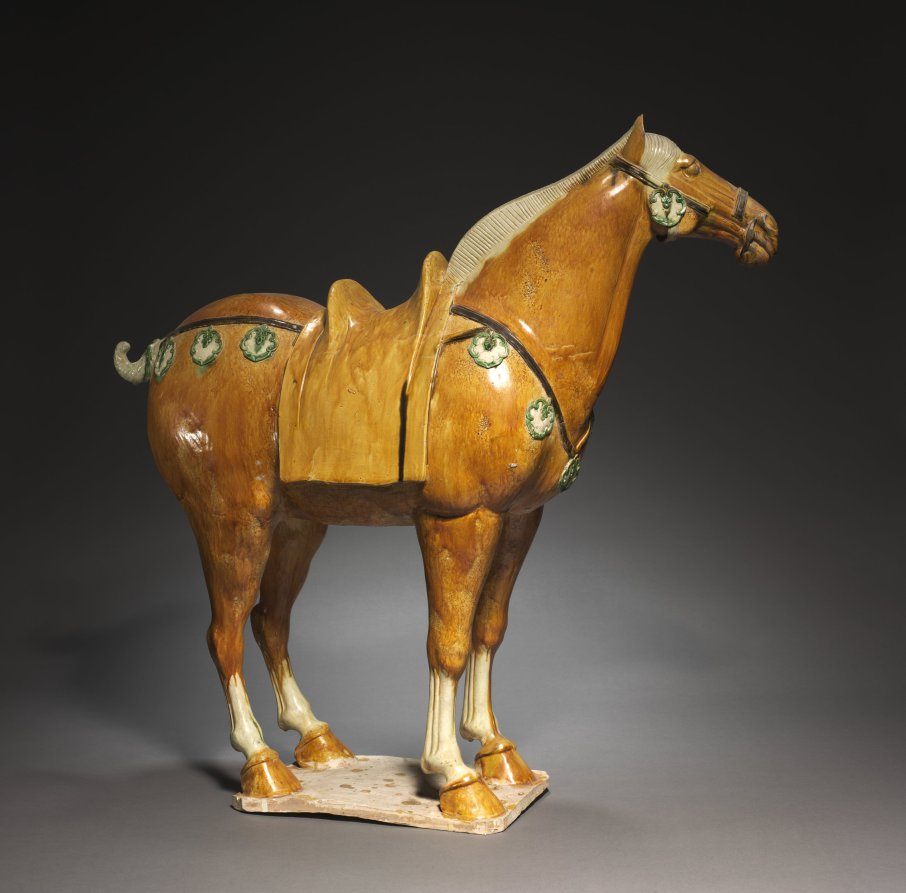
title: Horse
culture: China, probably Henan province, Tang dynasty (618–907)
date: late 600s–800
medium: glazed earthenware, sancai (three-color) ware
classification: Sculpture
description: This ceramic horse was part of a set of figures depicting a procession, all of which was included in the tomb of a person of high rank. In ancient China tombs were equipped with all the items it was thought to be needed in the afterlife—including horses, as an essential mode of transportation.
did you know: Sancai (three-color) glazes in green, amber, and transparent white show the high social status of the tomb’s occupant.